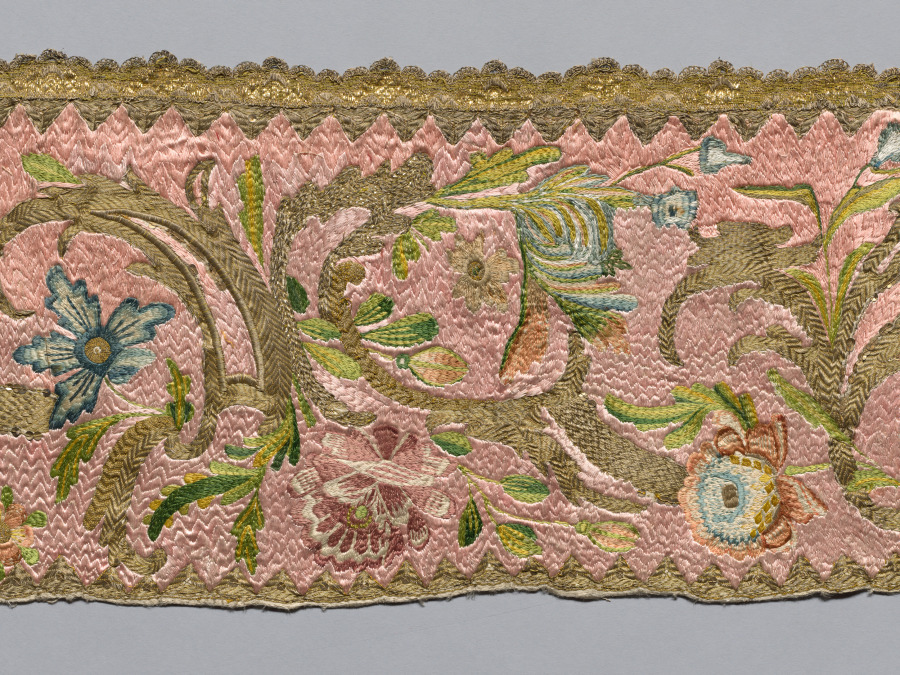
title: Embroidered Strip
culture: Italy, 18th century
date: 1700s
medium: embroidery, silk and gold thread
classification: Embroidery